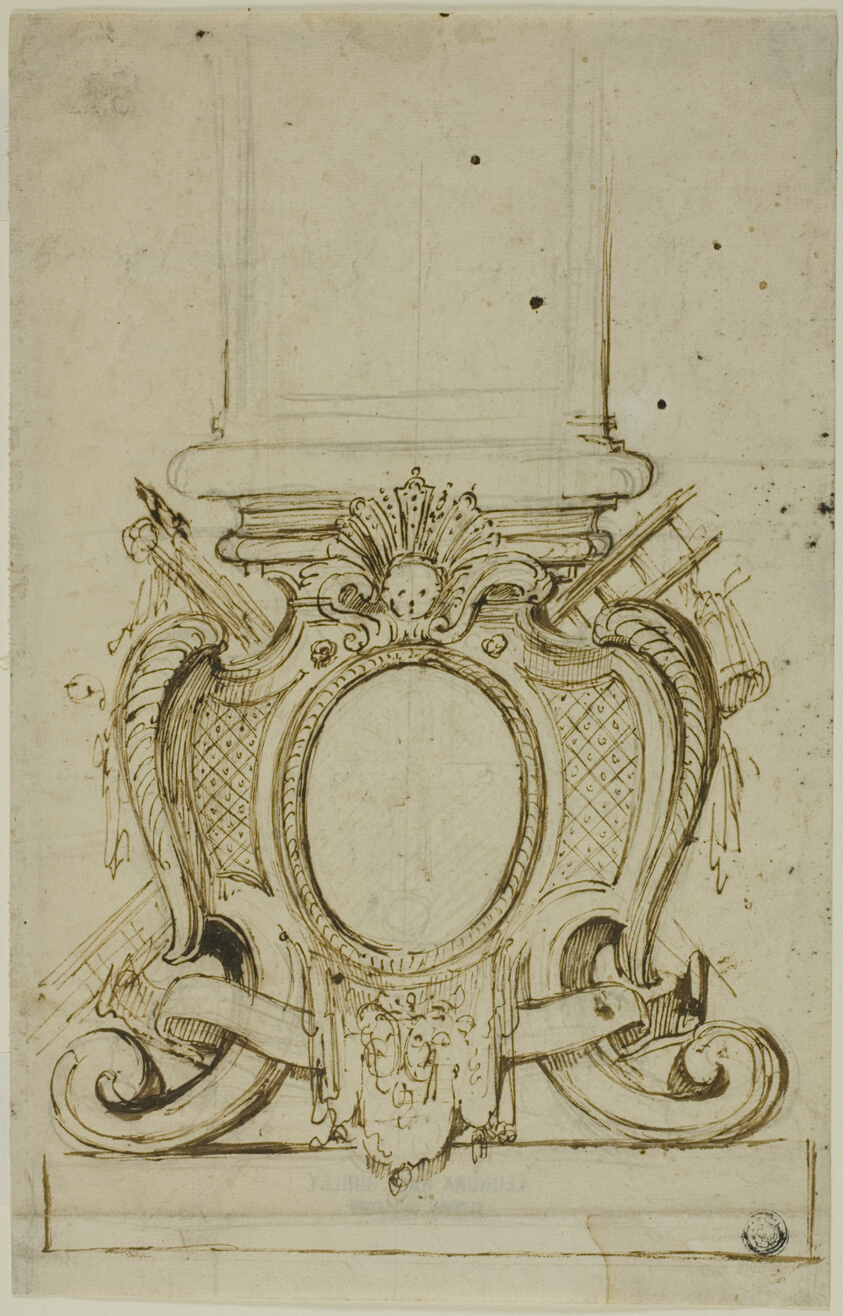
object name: Drawing and Watercolor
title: Design for the Base of a Pedestal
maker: Unknown Artist; French, 1700-1799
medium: Pen and brown ink over graphite, on cream laid paper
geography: France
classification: pen and ink drawings; drawings (visual works); prints and drawing